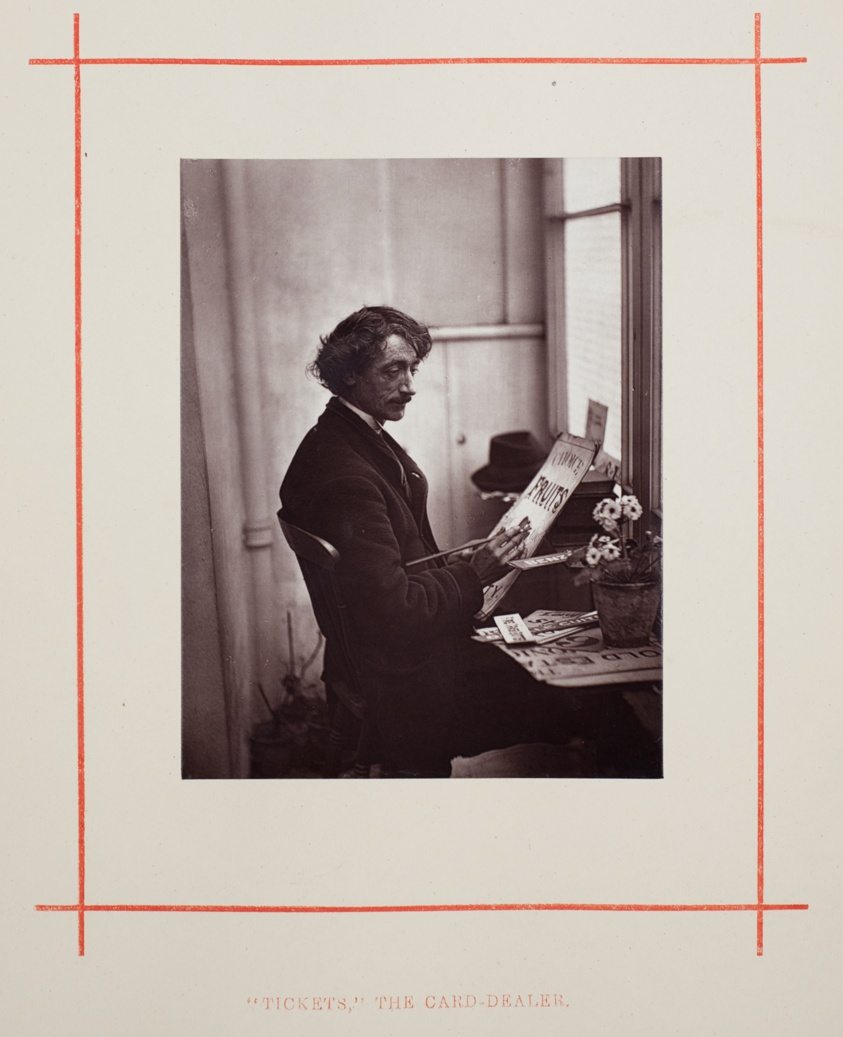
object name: Photograph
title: "Tickets" the Card-Dealer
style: 19th century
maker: John Thomson (Scottish, 1837–1921)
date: 1877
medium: Woodburytype, from the album "Street Life in London"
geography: Scotland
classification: photograph; photography